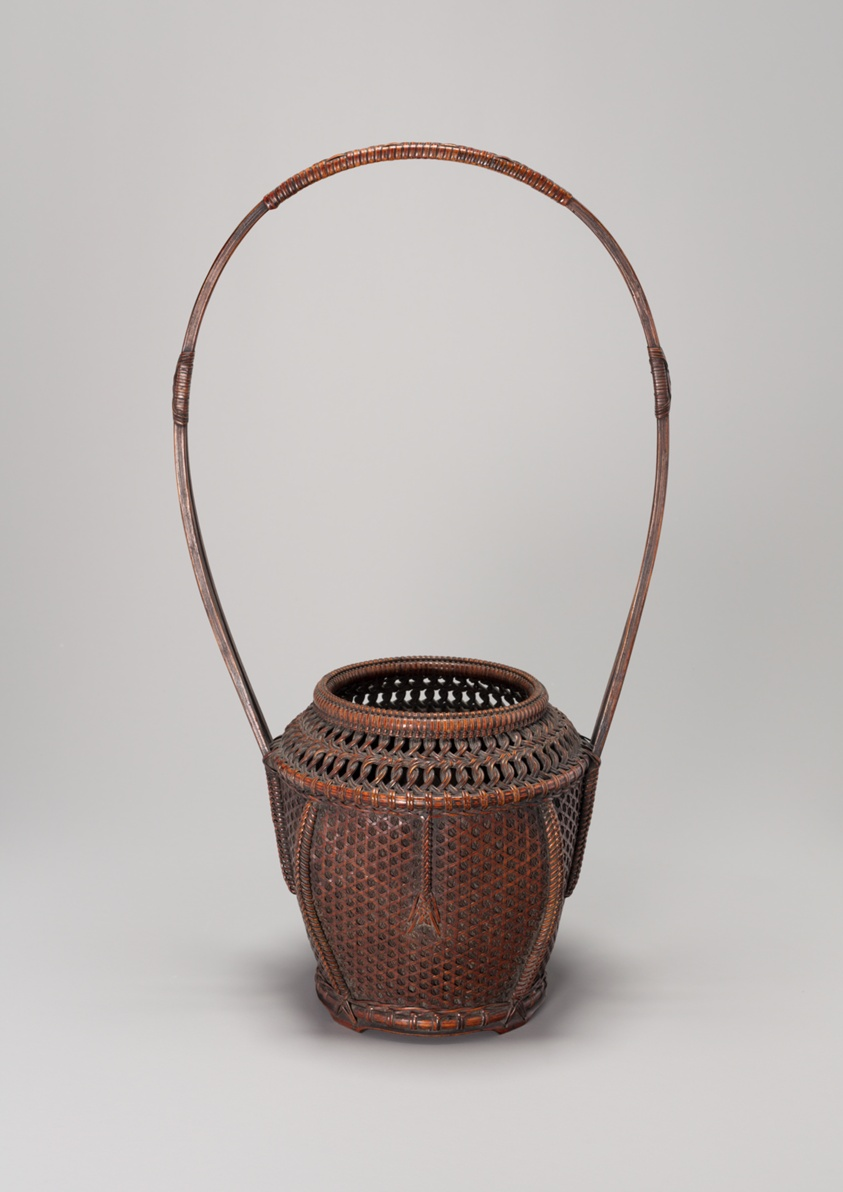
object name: Decorative Arts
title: Peony Ikebana Basket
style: Japanese (culture or style)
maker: Artist unknown; Japanese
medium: Bamboo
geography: Japan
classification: basketry; decorative arts